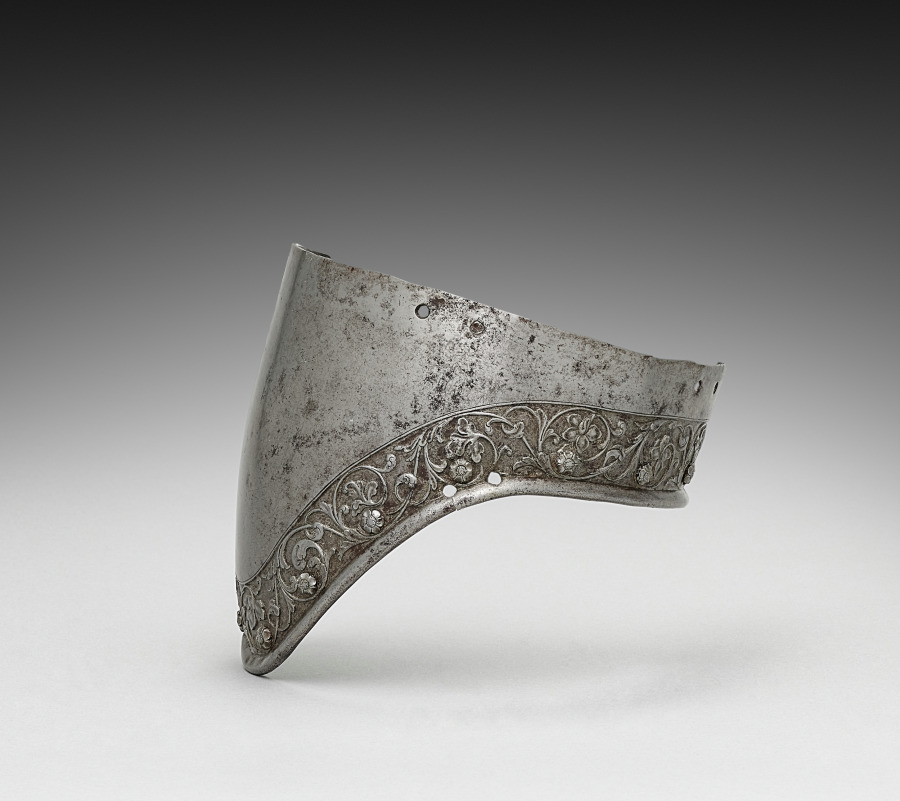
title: Upper Arm Canon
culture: Itlay, Milanese style of 16th century, probably 19th century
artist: attributed to Negroli Workshop (Italian, c. 1500–1561)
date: 1800s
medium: steel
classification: Arms and Armor